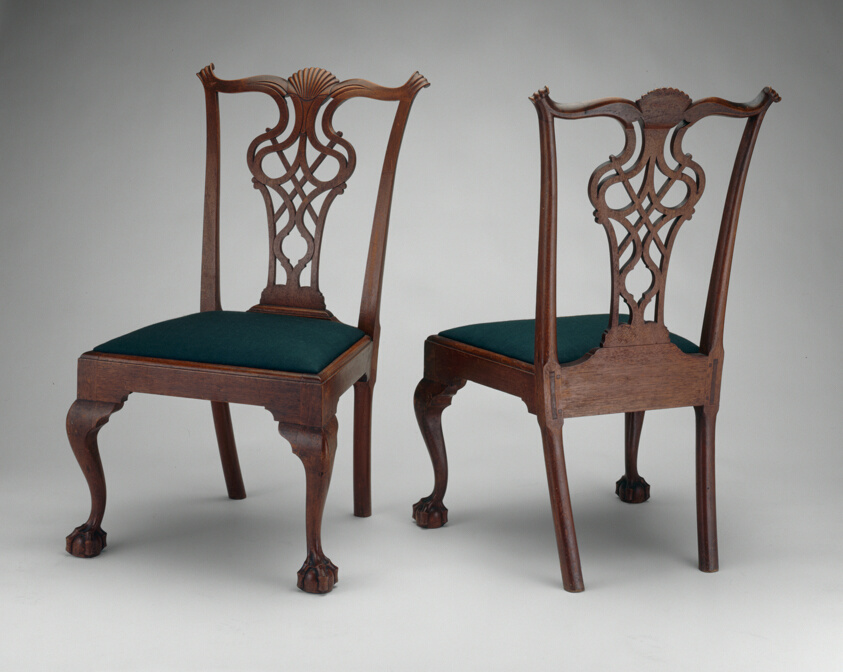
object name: Furniture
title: Pair of Side Chairs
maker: Attributed to Chapin School of Cabinetmakers; Hartford County, Connecticut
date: 1770–90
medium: Mahogany with white pine, yellow pine, and upholstery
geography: East Windsor Hill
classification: seating; furniture; american decorative arts; american arts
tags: furniture